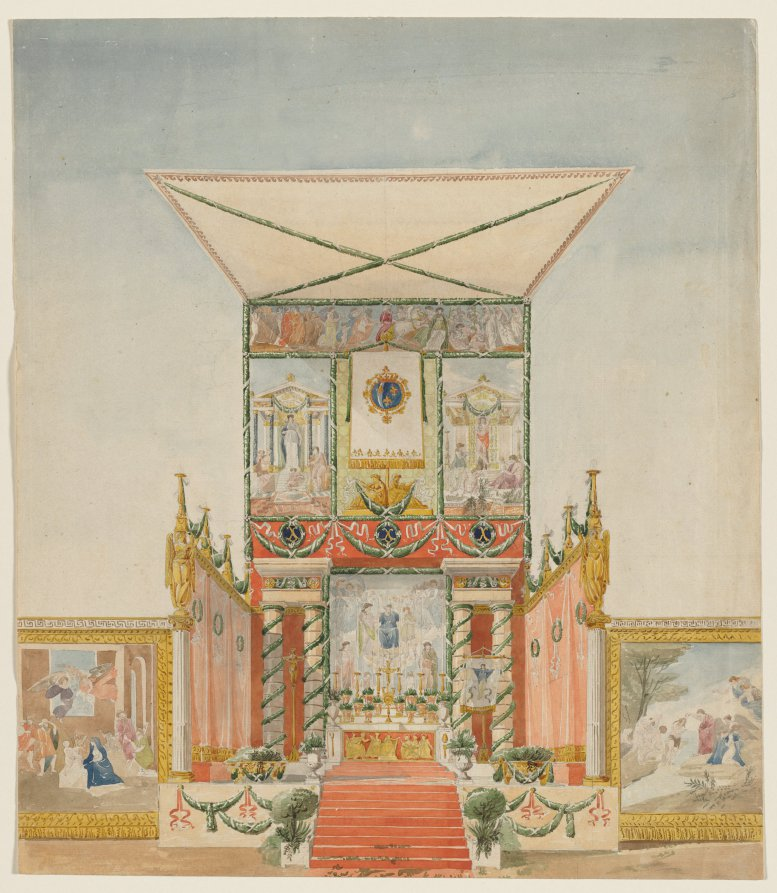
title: Portable Field Altar for Charles X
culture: France, 19th century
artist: Alexandre Denis Abel de Pujol (French, 1787–1861)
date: 1824–1830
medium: watercolor with graphite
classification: Drawing